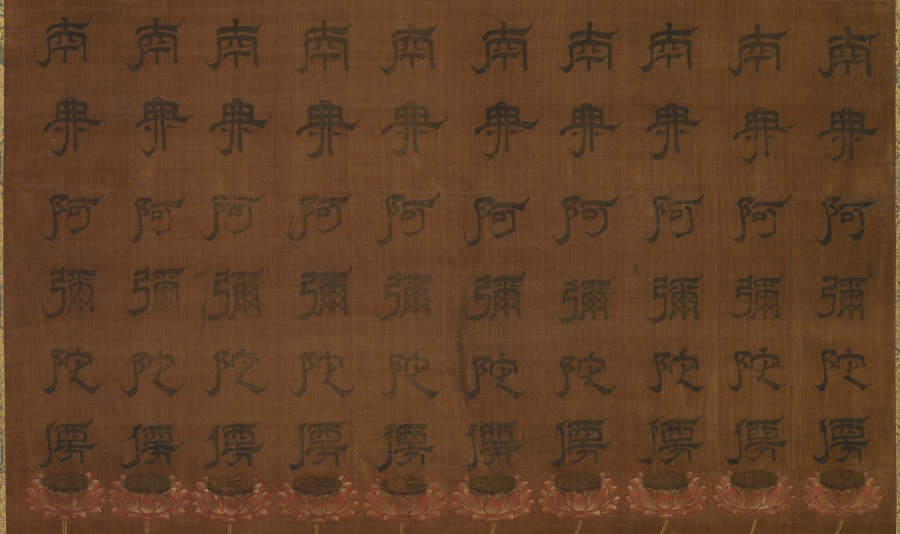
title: Buddha Amitābha with Two Attending Bodhisattvas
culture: China, Southern Song dynasty (1127-1279)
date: 1200s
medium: Hanging scroll; ink and color on silk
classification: Painting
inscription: 南無阿彌陀佛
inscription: 沙門善導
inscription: 觀世音菩薩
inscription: 大勢至菩薩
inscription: 永隆元年十月十五日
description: The supreme deities that rule over the Western Paradise—Amitābha (阿彌陀 in Chinese), Avalokiteśvara (Guanyin 觀音), and Mahāsthāmaprāpta (Dashizhi 大勢至)—are here enclosed within a circle of light. To secure entry into that paradise for Buddhist followers of the Pure Land sect, one must recite the phrase namo amituofo (南無阿彌陀佛, Homage to the Buddha Amitābha). Here the phrase is repeated 10 times in calligraphy above the figures, reinforcing the need for continual recitation.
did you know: Each line of calligraphy, which invokes the Buddha's name, emerges from a lotus blossom.